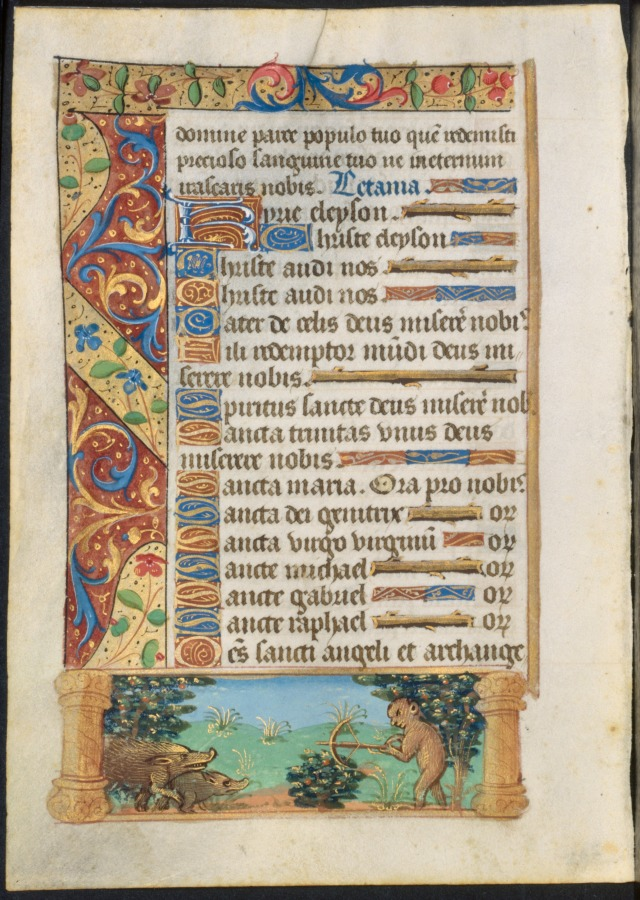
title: Leaf from a Book of Hours: Ape Hunting Wild Boars (recto) and Ape Fishing (verso)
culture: France, Paris or Rouen, 16th century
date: c. 1500–1510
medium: ink, tempera and liquid gold on vellum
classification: Manuscript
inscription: Letania Kyrie eleyson. Christe eleison. Christe audi nos. Christe audi nos. Pater de caelis Deus, miserere nobis. Spiritus sancta Deus, miserere nobis. Sancta Trinitas unus Deus, miserere nobis. Sancta Maria, ora pro nobis. Sancta Dei genitrix, ON. Sancta virgo virginum. ON. Sancte Michael, ON. Sancte Gabriel ON. Sancte Raphael ON. Oes sancti angeli et archangeli…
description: The litany of the saints is among the most ancient and emotional Christian liturgical texts, dating in the West to at least the AD 400s. In a book of hours, the litanies is a list of saints’ names expressed in hierarchical order and individual rank. These names were recited rhythmically as invocations, followed each time by Ora pro nobis (Pray for us). In this way, saints were called upon by sinners seeking forgiveness and salvation. The bas-de-page (lower margin), features an ape hunting wild boars: both animals were symbolic of vice and lust. Perhaps deriving from a fable, the scene could be amusing or diversionary, but it was likely instructive for the medieval owner of the book.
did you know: The ape and the wild boar symbolized vice in general and lust in particular during the Middle Ages.